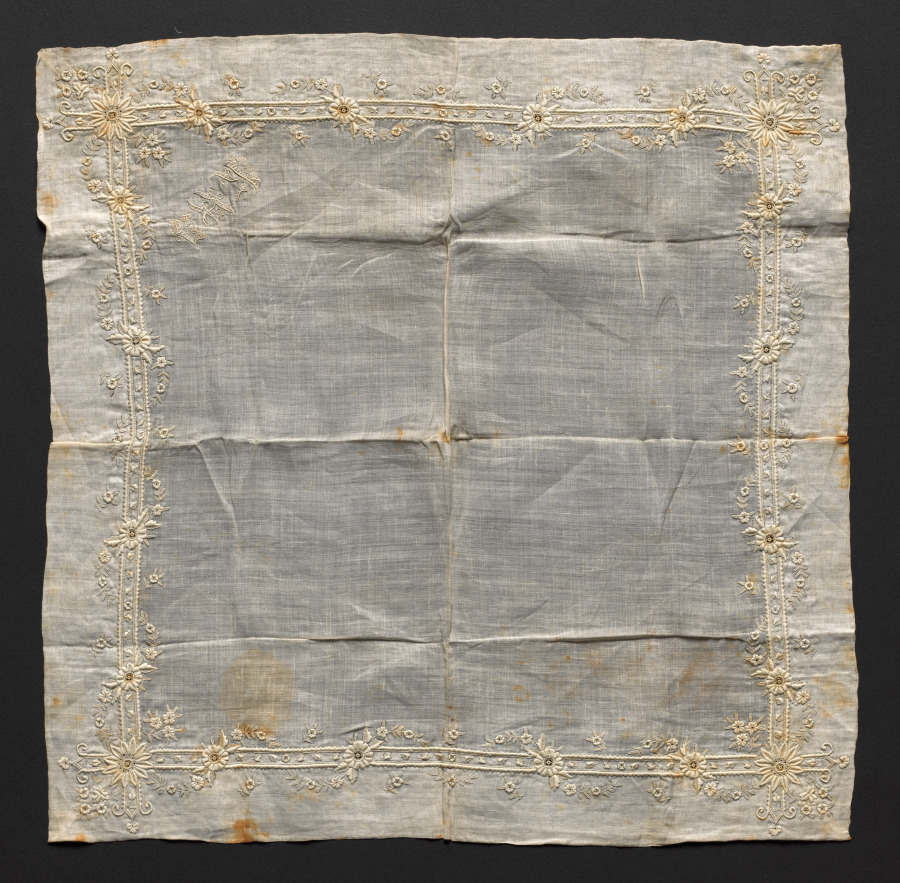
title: Handkerchief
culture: Switzerland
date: 1876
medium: Plain weave linen: embroidered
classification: Embroidery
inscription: initials in one corner: "K.H.I."